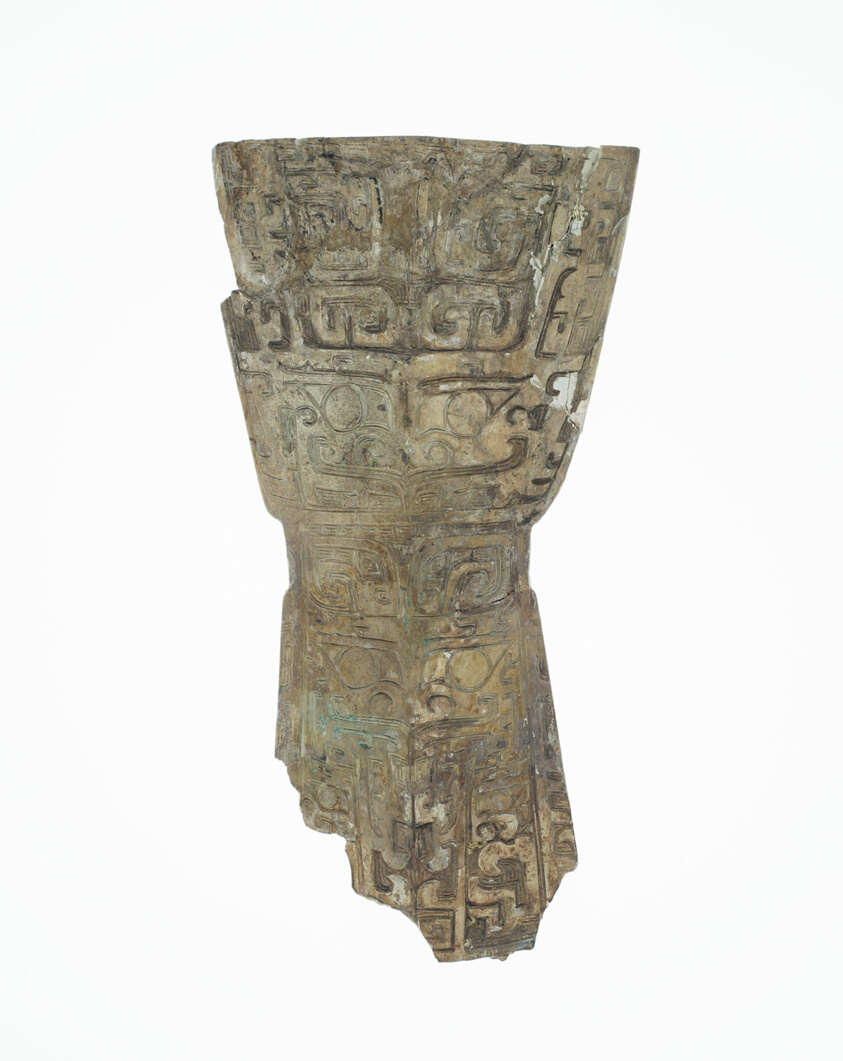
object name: Sculpture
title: Fragment of Spatula (Si)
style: Chinese (culture or style)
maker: China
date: Shang dynasty ( about 1600–1045 BC), 13th/11th century BC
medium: Bone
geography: China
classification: bone; sculpture; asian art